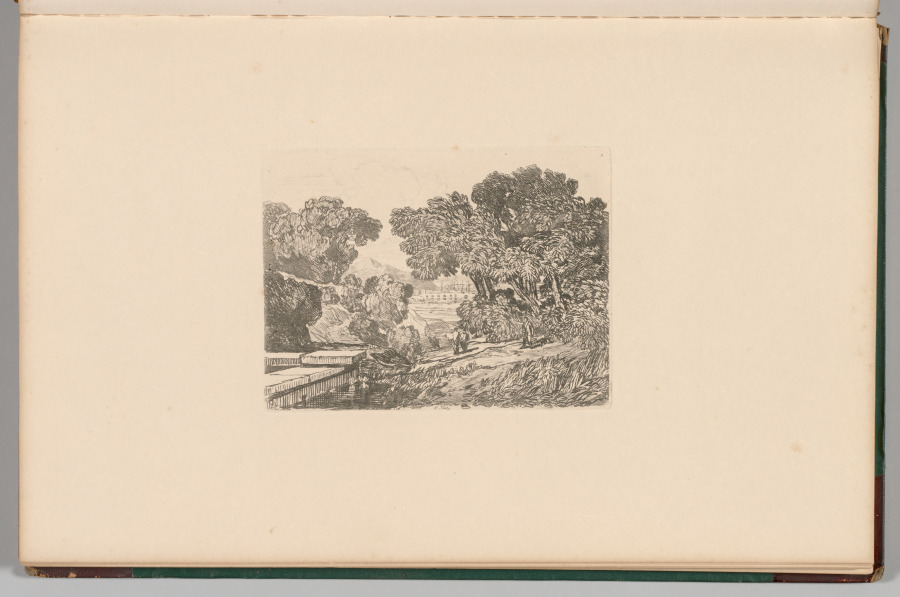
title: Liber Studiorum: Plate 9, A Study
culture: England, 19th century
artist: John Sell Cotman (British, 1782–1842)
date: 1838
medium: softground etching, from a bound volume containing 48 plates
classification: Bound Volume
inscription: In plate, within image, upper right: 9; in plate, below image: A Study J S Cotman